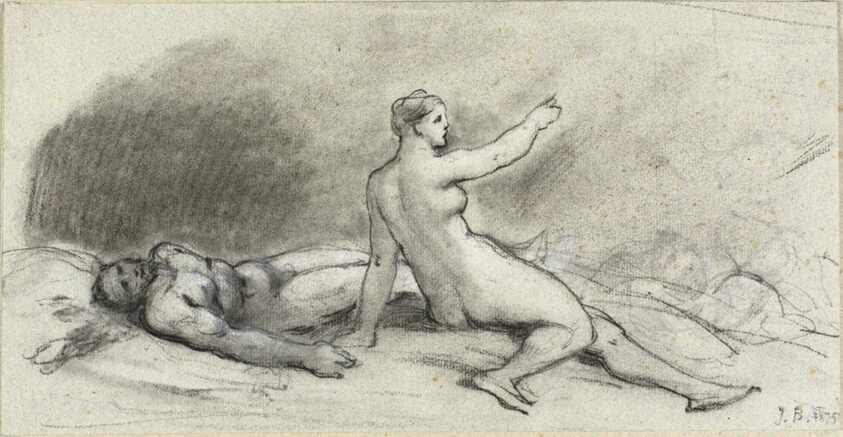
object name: Drawing and Watercolor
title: Nude Woman Seated with Nude Man Asleep (recto); Female Torso Seen from Behind (verso)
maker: Jean Béraud (French, 1849-1935)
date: 1875 (recto); c. 1875 (verso)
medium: Black and white chalk, with stumping (recto), and black chalk (verso), on blue laid paper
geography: France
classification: chalk; drawings (visual works); prints and drawing